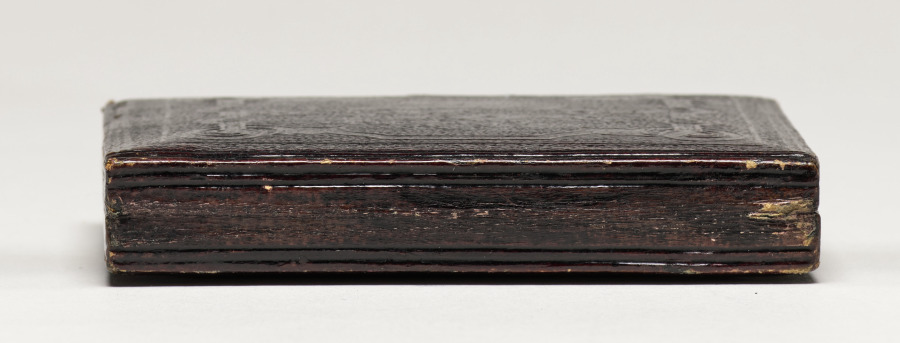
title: Mother and Child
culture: America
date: c. 1860–65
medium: daguerreotype, applied color, sixth-plate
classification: Photograph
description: Some of the most inventive and technically skilled practitioners in the early history of photography are as yet unidentified. However, with time more of these individuals will probably be recognized by name. Introduced into America soon after its invention in 1839 by the Frenchman Louis-Jacques-Mandé Daguerre, the daguerreotype flourished from 1840 to the mid-1860s. This beautiful daguerreotype in its original case is an outstanding example of a very popular subject: mother and child. The polished silver plate precisely renders in warm tones the likeness of the elaborately dressed sitters. The mother gently steadied the child's head so that it would not move during the long exposure required by the daguerreotype process. Clearly, the maker's knowledge of chemistry and traditional principles of design were necessary for this charming portrait.